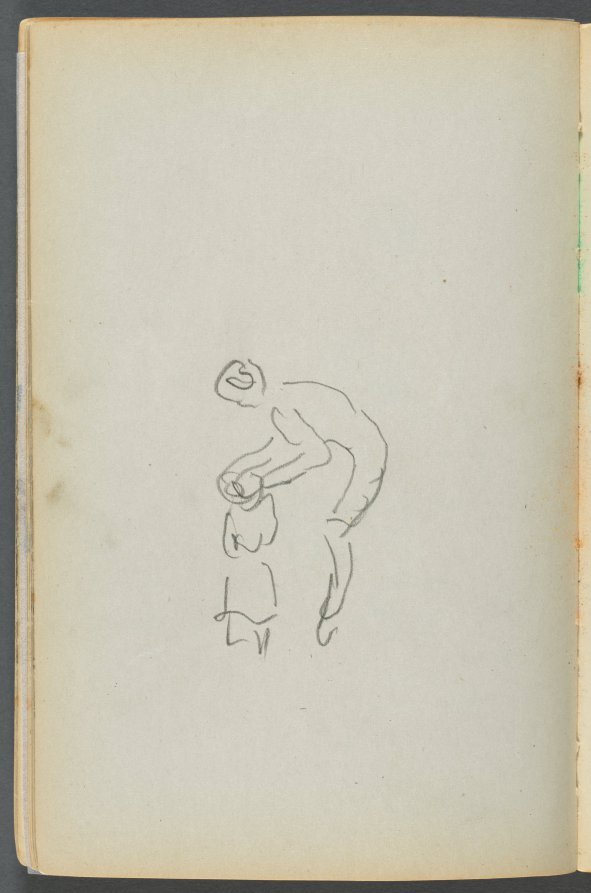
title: Sketchbook- The Granite Shore Hotel, Rockport, page 050: Mother and Child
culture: America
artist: Maurice Prendergast (American, born Newfoundland [now Canada], 1858–1924)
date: 1905–10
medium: graphite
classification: Bound Volume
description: This sketchbook contains 72 pages of pencil drawings and 9 watercolors of Cape Ann. On the inside of the cover Prendergast wrote the address of the Granite Shore Hotel in Rockport, Massachusetts.